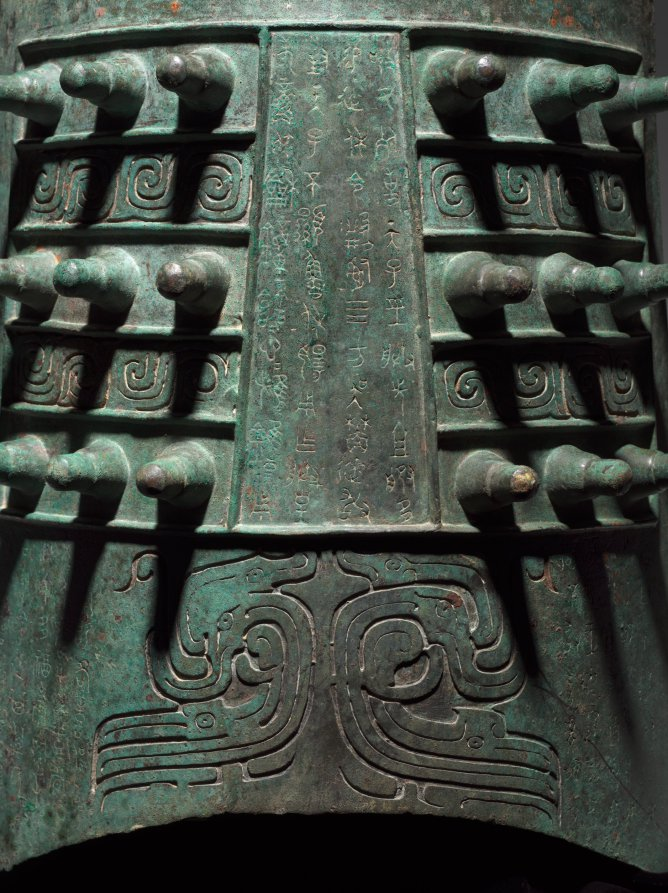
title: Bell (Lai Zhong)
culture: China, Shaanxi province, Meixian, Western Zhou dynasty (c. 1046–771 BCE)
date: c. 800–700 BCE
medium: bronze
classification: Metalwork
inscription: Lai proclaimed: "Great and illustrious was my august late father who made his heart clean following the disciplined virtue of his forefathers and dutifully served the past king. I, Lai, now succeed him in service and dare not fail. Respectfully, from dawn to dusk I will earnestly--even unto death--serve the Son of Heaven, taking as a model the obligation of my forefathers." I, Lai, was presented with many things. Then came the [king's] gracious command: "Manage the fisheries and forests of the realm." "I, Lai, dare to respond to the great, illustrious, sagely, and gracious favor of the Son of Heaven, extolling him and using this as cause to make for my august late father Gongshu a set of harmonized bells. Ding, dong, bing, bong, ding, dong, bing, bong. May they be used in acts of piety, reverently gladdening past luminaries. May the past luminaries who dwell on high help perpetuate this command, sending down upon me good fortune, tranquility, and purity. May I, Lai, live long in service to the Son of Heaven." May sons' sons and grandsons' grandsons forever treasure these [bells].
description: In ancient China, music and ritual had political significance and were linked inseparably to the power of states. During the Zhou dynasty, bronze bells were made in sets of eight to sixty bells. This bell is the second largest from a set of eight. This bell bears an inscription of 118 characters about its owner, Lai, and why it was cast. Lai's ancestors dutifully served the Western Zhou royal court, and he was granted a hereditary position by the "Son of Heaven" (the ruler). To express filial piety, Lai commissioned a set of bells as an offering to his father, Gongshu, in the hope that they would be forever treasured by future generations. This important inscription also provides an early example of Chinese calligraphy highlighting the purely abstract lines and construction of characters.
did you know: The technical sophistication of the unusual lens-shaped cavity allowed the bell to produce two different tones.